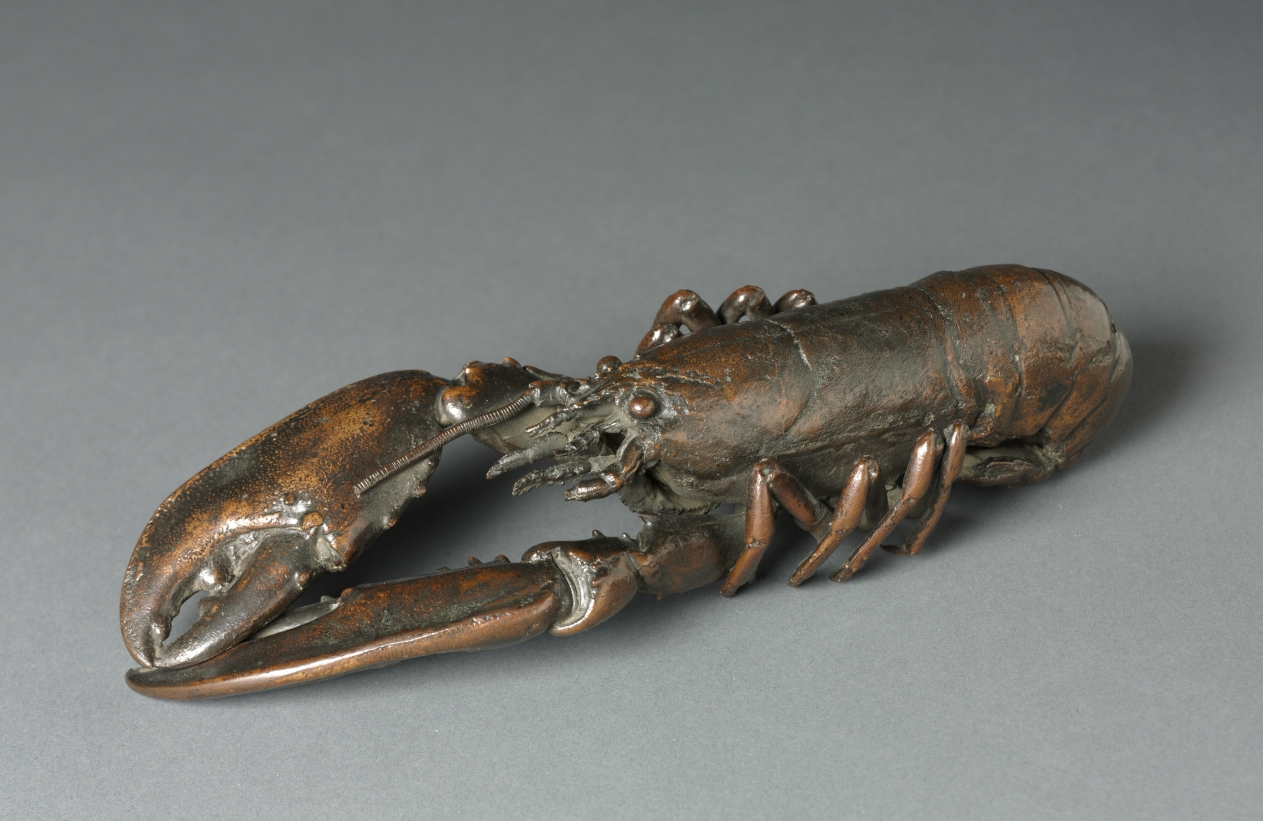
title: Lobster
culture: Italy, possibly Padua, 16th century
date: c. 1500–1550 or later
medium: bronze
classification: Sculpture